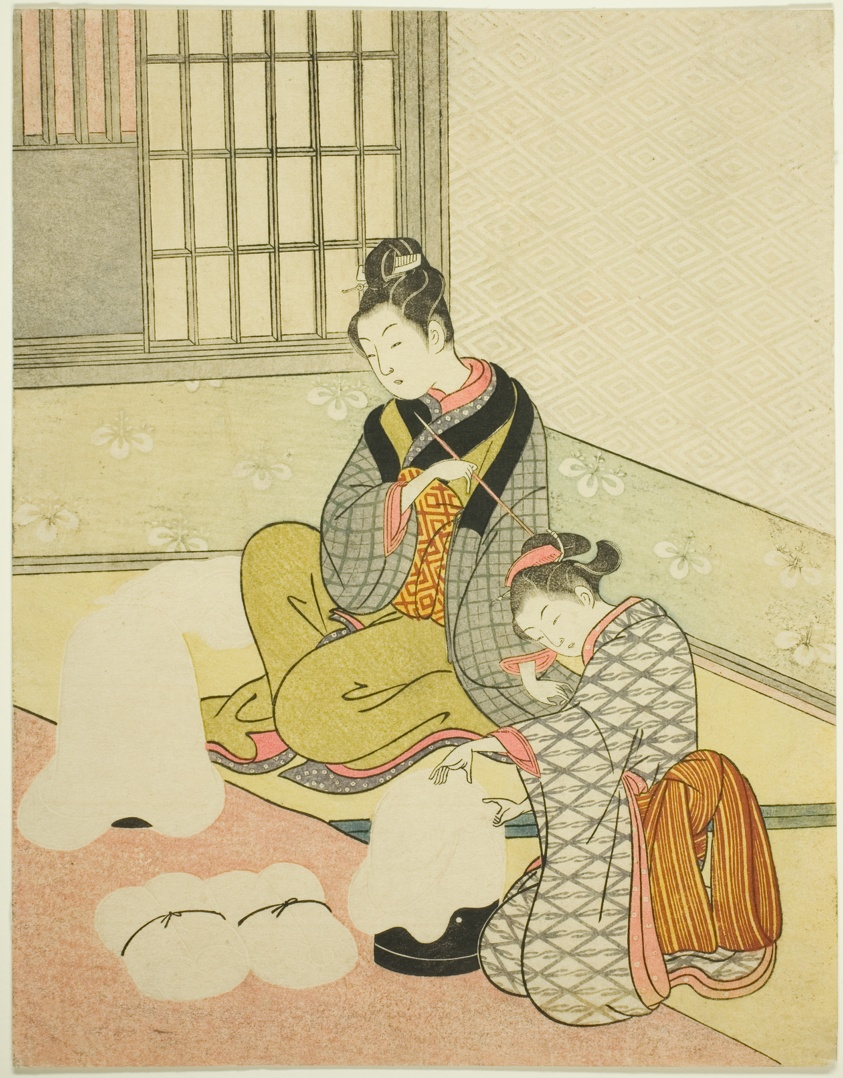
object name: Print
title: Evening Snow on a Floss Shaper (Nurioke no bosetsu), from the series "Eight Views of the Parlor (Zashiki hakkei)"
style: Japanese (culture or style)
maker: Suzuki Harunobu 鈴木 春信; Japanese, 1725 (?)-1770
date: c. 1766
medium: Color woodblock print; chuban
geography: Japan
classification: woodblock print; print; asian art